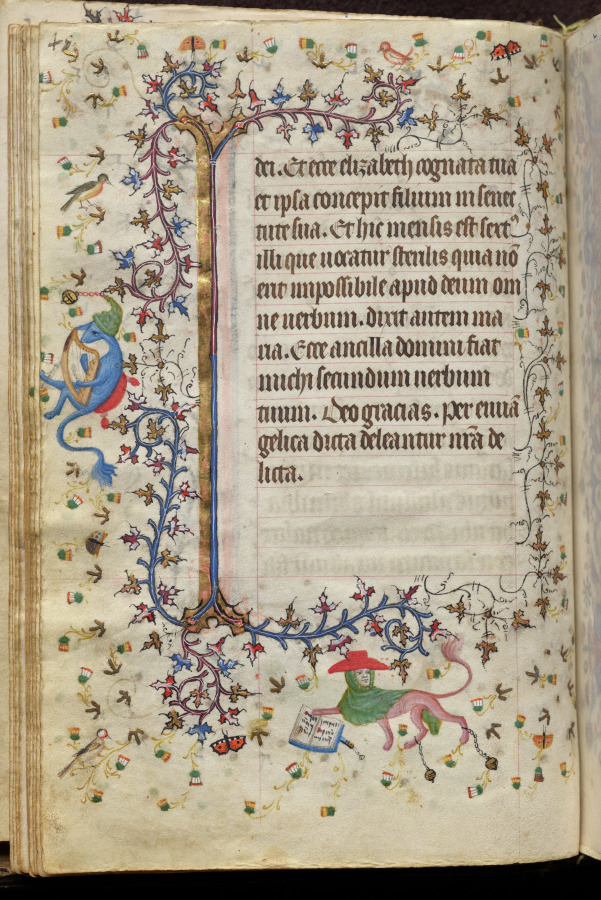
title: Hours of Charles the Noble, King of Navarre (1361-1425): fol. 24v, Text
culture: France, Paris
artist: Master of the Brussels Initials and Associates (French)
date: c. 1405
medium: ink, tempera, and gold on vellum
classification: Bound Volume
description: This precious book was highly prized by its owner, Charles III, King of Navarre, a French-born prince whose coat of arms is painted on 20 folios. Charles visited Paris on numerous occasions and likely acquired this volume there in 1404. Paris was the center of the European book trade at the time and attracted illuminators from many parts of Europe. This manuscript represents one of the most remarkable fusions of French and Italian taste in book illumination. Though conforming to Parisian standards, most of the book’s major miniatures are the work of the Brussels Initials Master, an Italian illuminator who previously worked in Bologna and Padua.